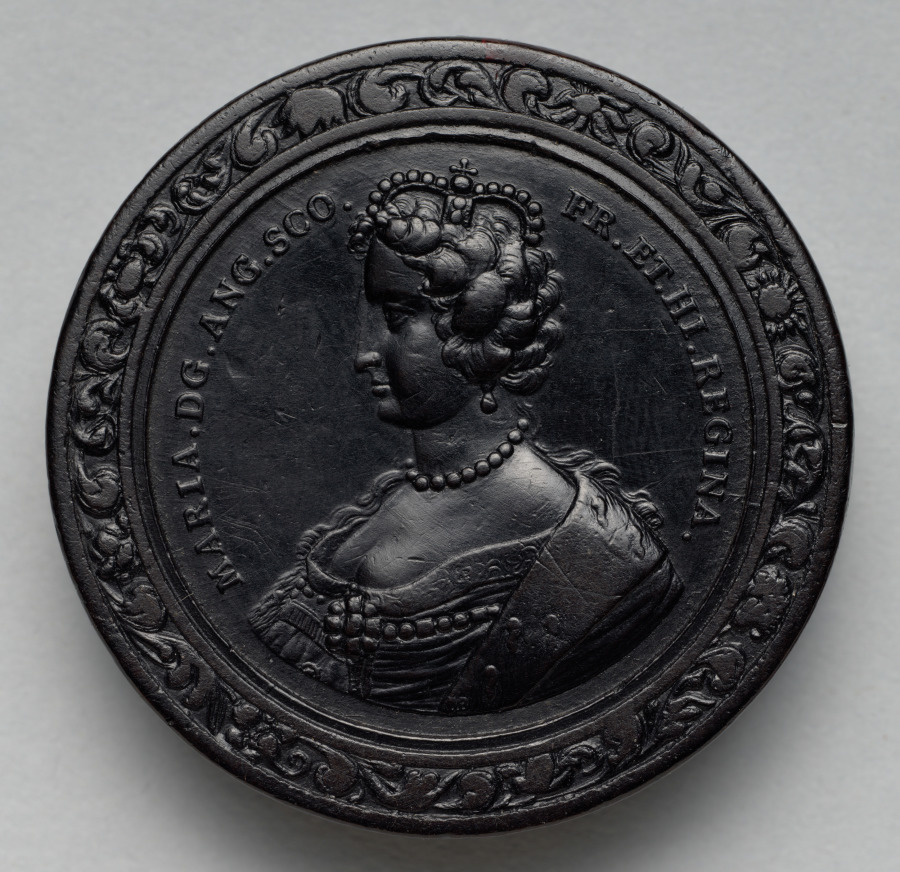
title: Gaming Piece (reverse)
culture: Germany, late 17th-early 18th Century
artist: Martin Brunner (German, 1659–1725)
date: c.1700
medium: wood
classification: Furniture and woodwork